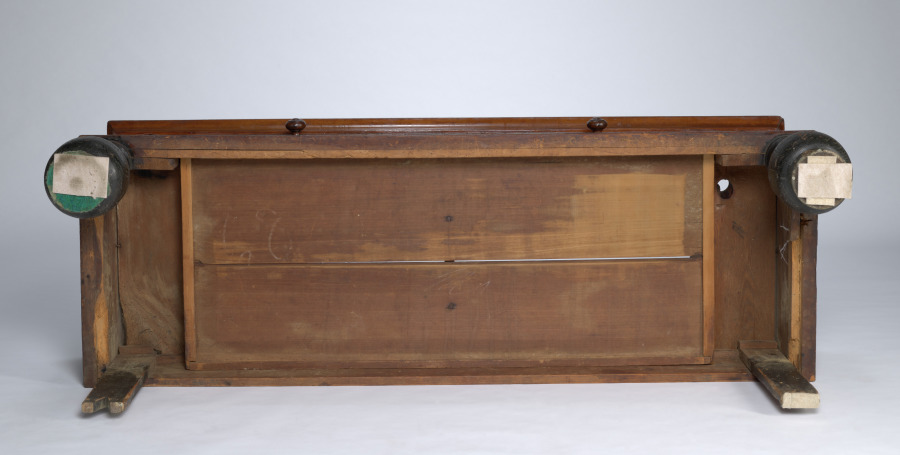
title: Kast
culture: American, King County, NY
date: c. 1710–1740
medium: Various woods, wrought iron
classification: Furniture and woodwork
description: The earliest furniture made in America often shared similarities with works made in the country from where the settlers originated. With its bun feet, paneled surface, and broad projecting cornice, this wardrobe (kast) resembles earlier Dutch examples that come from Amsterdam and its surrounding areas. Therefore, this wardrobe was likely made by the Dutch settlers who colonized New York and New Jersey.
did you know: This Dutch American wardrobe was likely made in a community along the Hudson River in New York by a cabinetmaker who had originally come from the region in or around Amsterdam in Holland.